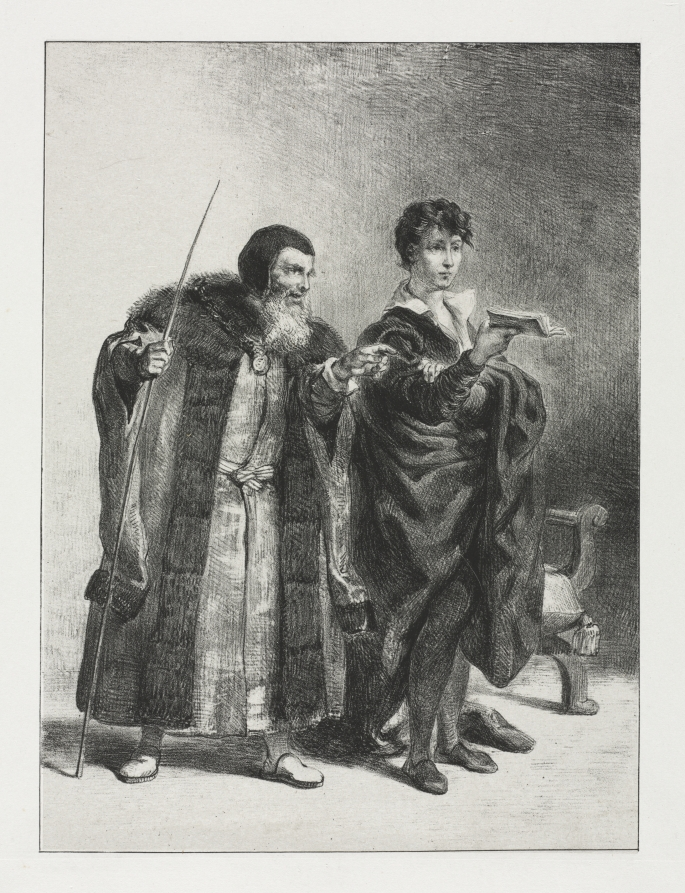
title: Hamlet: Polonius and Hamlet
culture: France, 19th century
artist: Eugène Delacroix (French, 1798–1863)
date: 1834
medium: lithograph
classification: Print